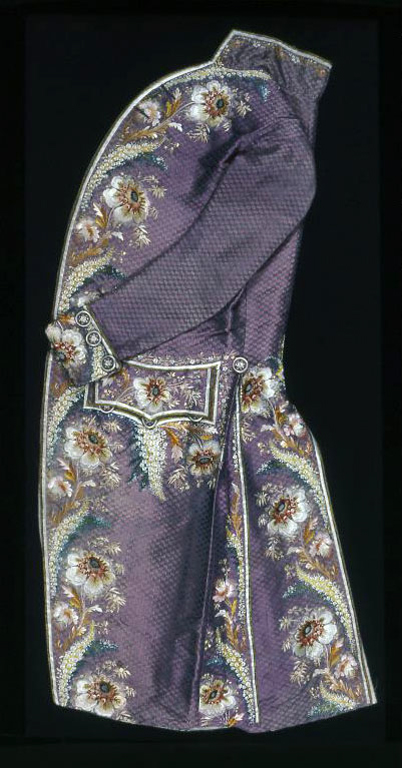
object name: Costume and Accessories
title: Man's Full-length Coat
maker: France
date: c. 1790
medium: Silk, plain weave with supplementary patterning wefts; embroidered with silk floss in satin, single satin, and stem stitches; French knots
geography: France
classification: textile; needlework (visual works); costume; dress (garment); clothing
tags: flowers